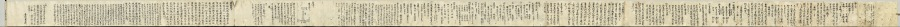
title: Scroll of Miscellaneous Notes written on a Calendar by Priest Seigen (recto)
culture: Japan, Kamakura period (1185–1333)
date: c. 1200–1231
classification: Manuscript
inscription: bears miscellaneous notes written by Priest Seigen.